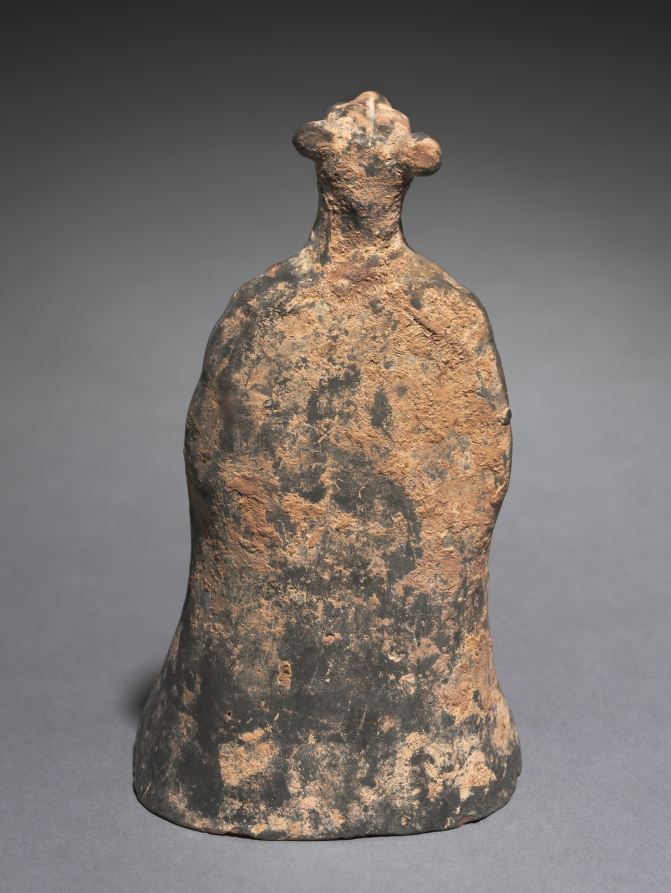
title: Mortuary Figure of the Zodiac Sign: Tiger (Gemini)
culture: China, Northern Wei dynasty (386-534)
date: 500s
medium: gray earthenware with traces of slip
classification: Sculpture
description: The twelve-animal zodiac series—rat, ox, tiger, rabbit, dragon, snake, horse, goat, monkey, rooster, dog, and boar—signifies a traditional Chinese concept of time structured in a cyclical order. The twelve animals are also linked to the art of fortune-telling that underlies human existence in connection with the changes of the universe. The use of the twelve zodiac animals as tomb furniture suggests they provided a cosmological structure for the afterlife.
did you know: The exterior surface was originally painted with a red, yellow, and brown slip over an overall layer of white slip.